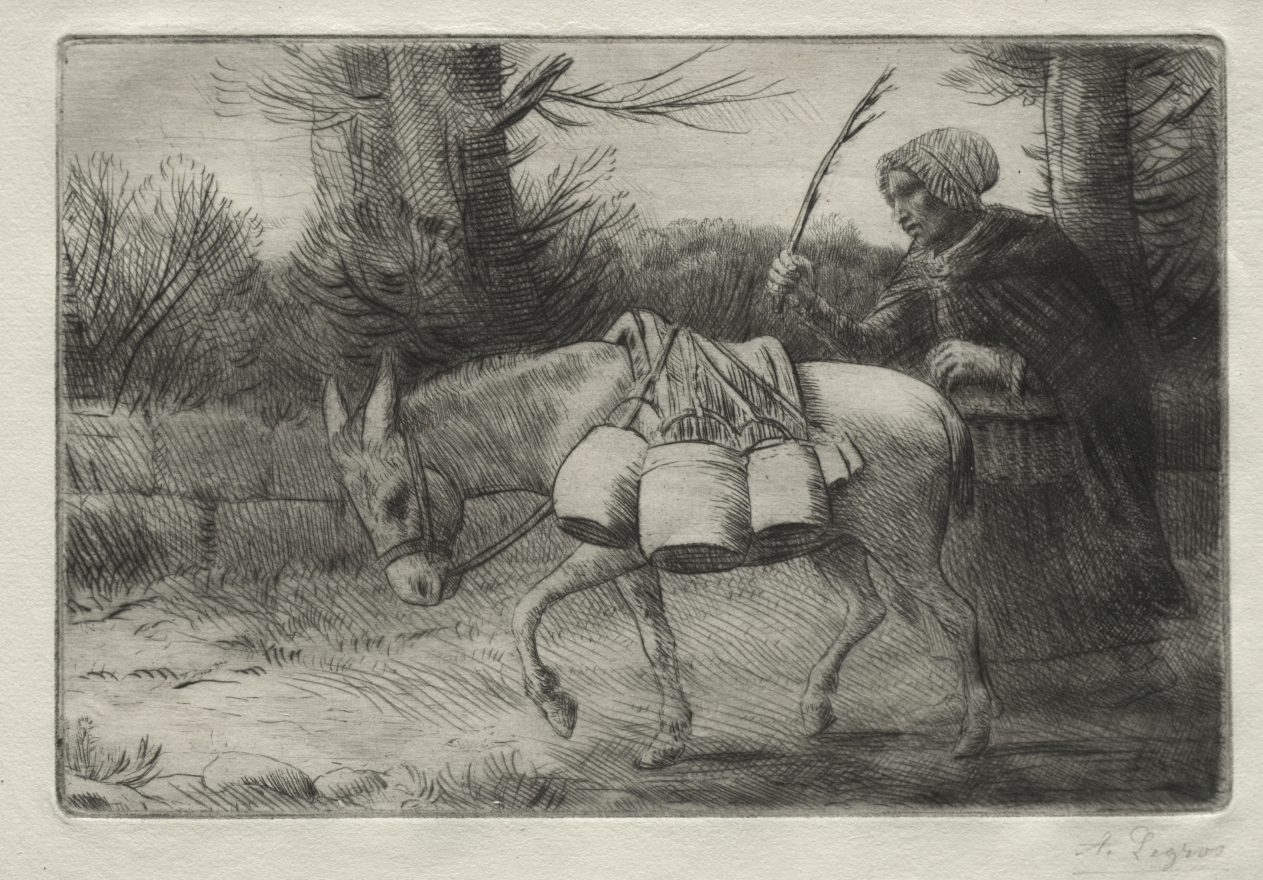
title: The Dairymaid of Boulogne (Third Plate)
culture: France, 19th-20th century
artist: Alphonse Legros (French, 1837–1911)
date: c. 1857–1911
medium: etching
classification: Print